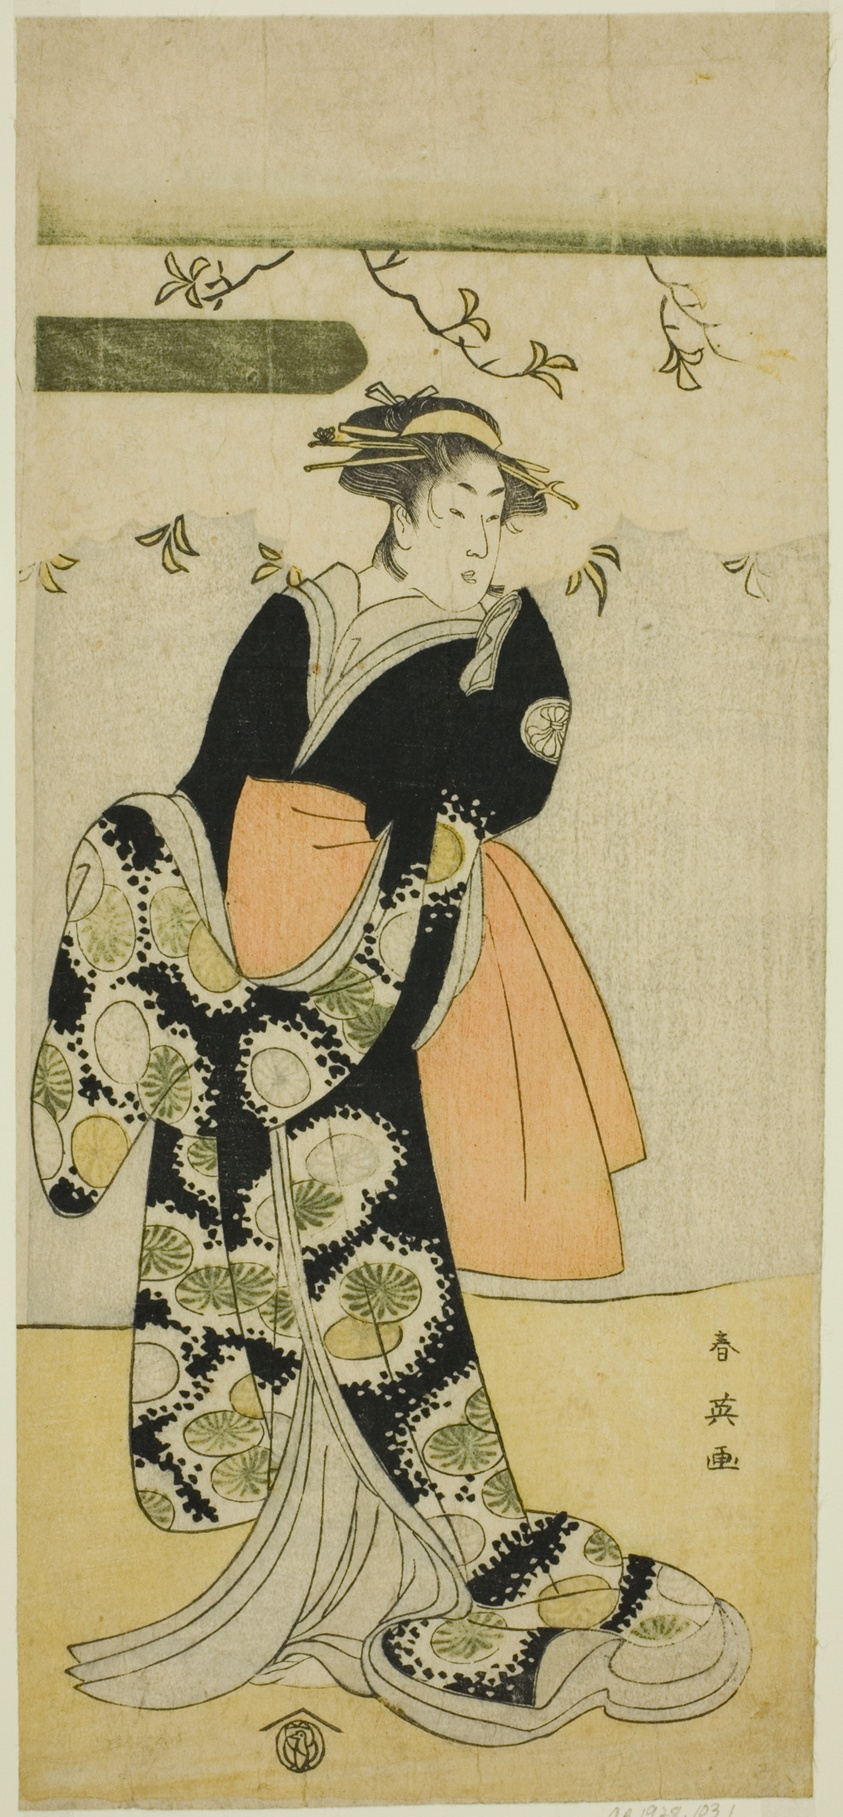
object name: Print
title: The Actor Segawa Kikunojo III in an Unidentified Role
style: Japanese (culture or style)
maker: Katsukawa Shun'ei (Japanese, 1762-1819)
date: late 1790s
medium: Color woodblock print; hosoban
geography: Japan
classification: print; asian art